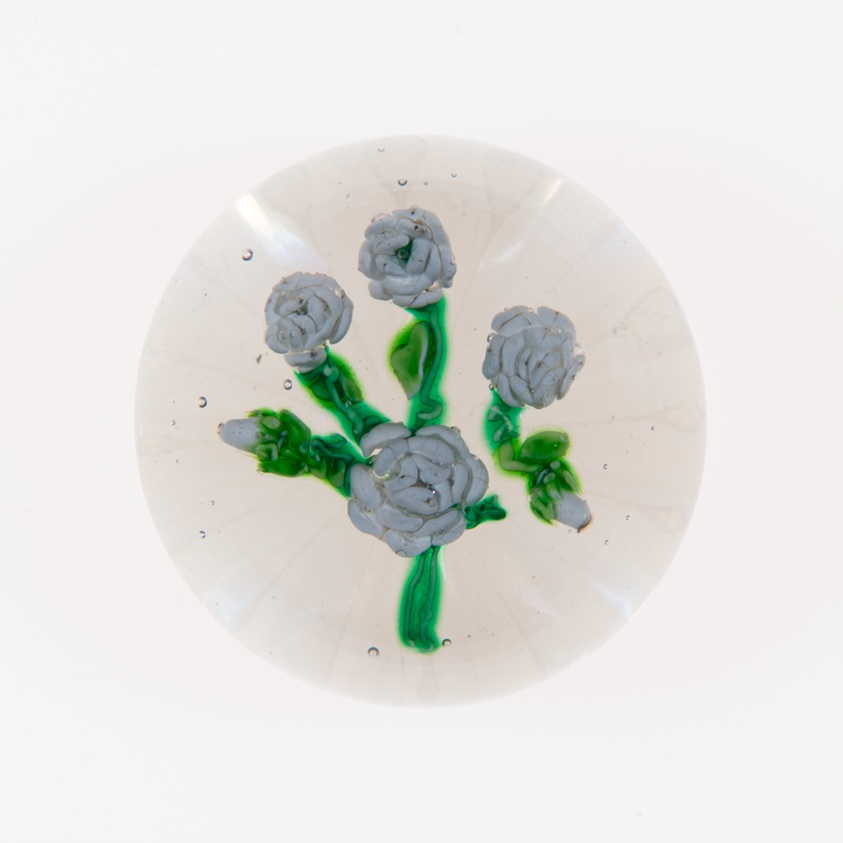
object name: Glass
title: Paperweight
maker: Unknown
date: 19th century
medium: Glass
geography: France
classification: paperweight; lampwork; european decorative arts; glass